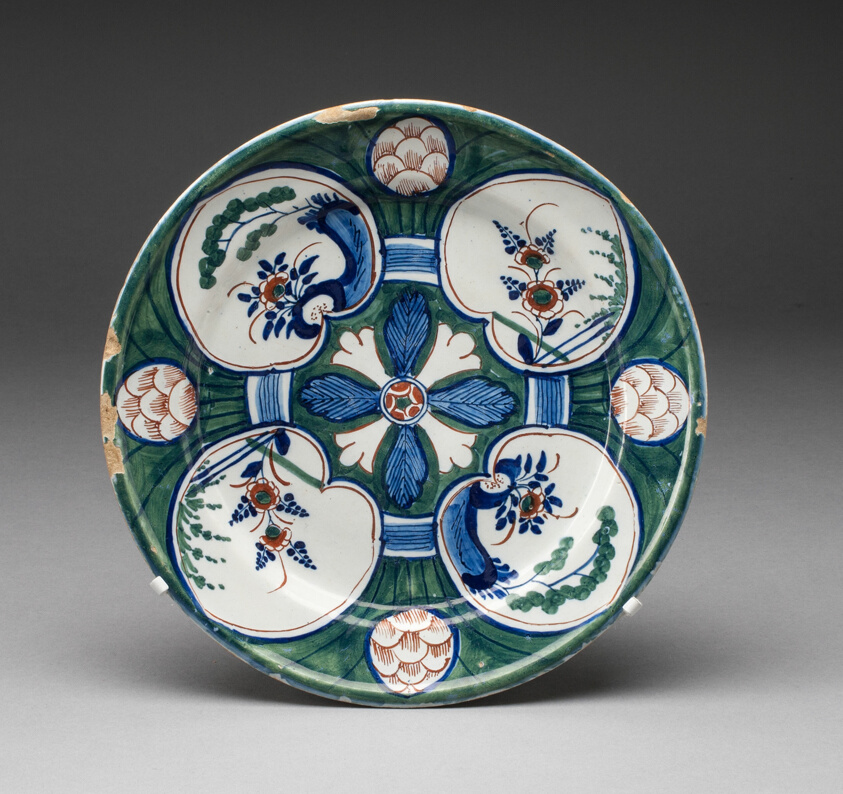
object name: Ceramics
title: Plate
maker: Augusteyne Reygensburgh (Dutch, 18th century)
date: c. 1700/25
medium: Tin-glazed earthenware (Delftware)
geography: Delft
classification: plate (general, dish); dish (vessel); earthenware; ceramics; european decorative arts